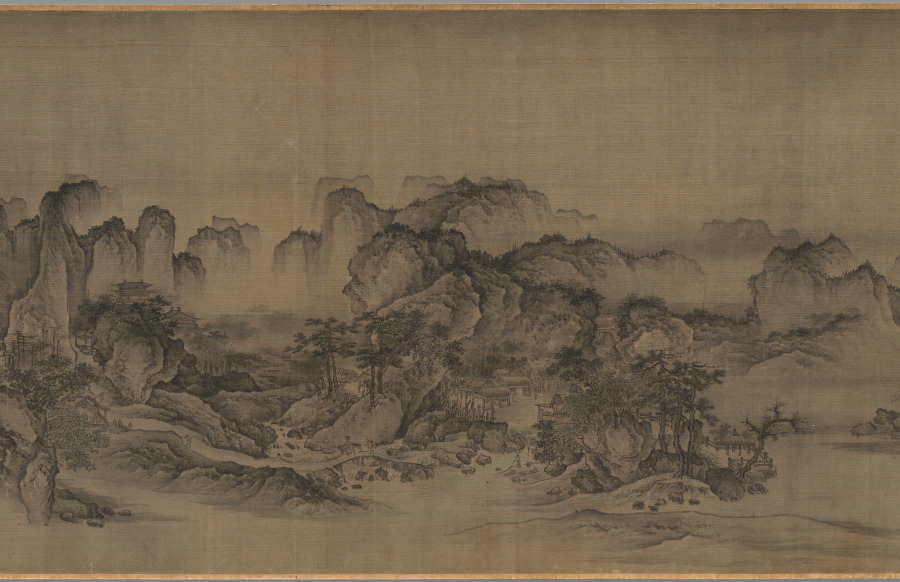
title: Streams and Mountains without End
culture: China, late Northern Song dynasty (960-1127) - Jin dynasty (1115-1234)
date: 1100–1150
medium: handscroll; ink and slight color on silk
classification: Painting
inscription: 9 colophons and 48 seals: 1 colophon, dated 1205, of Wang Wenwei 王文蔚 (dates unknown); 1 colophon, dated 1205, of Li Hui 李惠 (dates unknown); 1 colophon of Weiluo Tian Xie 蔚羅田獬 (dates unknown); 1 colophon, dated 1214, of He Yan 何言 (dates unknown); 1 colophon, dated 1326, of Cao Yuanyong 曹元用 (d. 1329) 1 colophon, dated 1332, of Kangli Zishan 康里子山 (Naonao; 1295-1345); 1 colophon, dated 1336, of Liu Zai 劉載. (dates unknown); 1 colophon, dated 1380, and 4 seals of Yang Mao 楊懋 (1300-after 1380); 4 seals of the Hou family (ca. 1340); 1 colophon of Wang Duo 王鐸 (1592-1652); 4 seals of Zhang Bingqian 張秉乾 (juren of 1729); 8 seals of Liang Qingbiao 梁清標 (1620-1691); 2 seals of the Qianlong emperor (r. 1736-95); 4 seals of the Jiaqing emperor (r. 1796-1820); 3 seals of the Xuantong emperor (r. 1909-11); 2 seals of Ye Gongchuo 葉恭綽 (1881-1968); 17 seals of Zhang Yuan 張爰 (Zhang Daqian 張大千, 1899-1983).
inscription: Colophon 1. Wang Wenwei 王文蔚. Dated third month and third day, 1205, under the reign of Zhangzong of the Jin dynasty. 造物元無心，山川秀氣聚。畫手亦無盡，各出新意度。 誰將妙林泉，淡墨寫縑素。重巒疊嶂間，三兩人家住。 茅舍隔素籬，小橋通細路。溪上數葉舟，雅有物外趣。 嵓崦藏招提，依稀認窗戶。山色四時宜，雲煙自朝暮。 不知塵世中，此景在何處。收拾買山錢，投老好歸去。 泰和乙丑三月三日平原王文蔚謹再拜，書于河東縣署之野趣堂。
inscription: Colophon 2. Li Hui 李惠. The colophon was written three days before the Qingming Festival in 1205. 畫師慣在山中居，含毫吮墨聊自娛。 閑將一段冰霜絹，寫出千里江山圖。 前山後山互出沒，山腰林樾相縈紆。 危橋澗溜瀉鳴玉，山根一匯為平湖。 波平短艇快漁釣，雲深細徑來樵蘇。 僊宮梵宇占幽勝，雕欄複閣森蓬壺。 往來行客煙靄外，飄飄野店青帘孤。 人家雞犬聲相接，熙熙化日安唐宇。 嗟余嗜好何其迂，膏肓泉石真吾徒。 一行作吏墮世網，薄書汨沒勞奔趨。 千巖萬壑但夢想，故園三徑應將蕪。 披圖暫洗黃塵眼，拊膺三嘆空踟躕。 泰和乙丑清明前三日絳臺李惠書于舜城府署之九思堂。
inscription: Colophon 3. Weiluo Tian Xie 蔚羅田獬. 畫工紛紛不可紀，擺脫俗流幾人耳。 夫誰援筆掃鵝溪，一段風煙且千里。 白波青嶂渺無窮，水接山兮山插水。 小橋野店相勾連，古寺樓臺突兀起。 飄然氣象與神俱，但患未明孰姓氏。 郭熙雖老典型存，為問主公無乃是。 此畫世希當寶藏，無與碌碌同一視。 更看卷首數公詩，奇絕清新相表裏。 蔚羅田獬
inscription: Colophon 4. He Yan 何言. Written in 1214. 萬有來自無，一真歸所託。畫師得三昧，胸中幻丘壑。 百態逐墨破，群形隨筆落。地近迹分明，天遙痕隱約。 雲物自吐吞，峯巒非斧鑿。江鄉閴無市，谷關常不鑰。 中有野夫閑，童琴而歩鶴。酒斾出籬懸，漁舟臨岸泊。 澗樹蔽橋樑，巖松迷殿閣。岑疊宿霧重，野曠林煙薄。 危棧接縈紆，亂泉通脈絡。途中人往來，僕馬何羸弱。 怪石虎踡跼，古木龍蟠錯。一幅宜好收，千金非易博。 玉堂閑卷舒，眼界增寥廓。視險尚寛平，見危除慘虐。 氣象溢國華，川澤資廟略。功名業已書，歸去鞭先著。 但知色即空，何是今非昨。飽乎仁智心，箇中無限樂。 貞祐甲戌秋暮，東營何言題。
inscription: Colophon 5. Cao Yuanyong 曹元用 (d. 1329). Dated 1326. 岸擁危橋斷，溪浮小艇斜。 萬山最深處，依約兩三家。 泰定丙寅秋，曹元用題。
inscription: Colophon 6. Kangli Zishan 康里子山 (i.e., Kangli Naonao). The colophon bears a date of 1332. 右溪山圖，意韻蕭灑。一見使人有烟霞之想，真可珍藏。又有□金諸名勝題詩其左。兵火之餘， 殊不易得也。 至順三年暮春之月，康里子山跋。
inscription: Colophon 7. Liu Zai 劉載. 雲拂埜田閑種玉，雨餘巖溜碎傾金。 幾時也結團茆去，麟閤恬然不挂心。 至元二年正月，長安劉載載之謹錄上。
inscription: Colophon 8. Yang Mao 楊懋 (1300–after 1380). 觀此圖，經營位置，筆法高古，山明石潤。其橋梁、路道、樹林、人物、遠近；一一誠得真山水之深趣。非當時名筆有大才者不能至此。不必問其誰何，可為神品。况宋金元三朝名公所跋，尚不能記，想其來尤遠矣。然而物經累變而尚存，是物之有壽者也。余不復再論。文顯其保之。洪武庚申春，八十翁楊懋觀。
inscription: Colophon 9. Wang Duo 王鐸 (1592–1652). 文蓀親翁博雅，文詩鴻暢。舍弟持此喜觀，遂抽管題數語： 山勢委折，筆墨無痕。宋人中如此不多見也。譬之兵家，當是韓白。王鐸。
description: Streams and Mountains without End was a landmark acquisition of 1953, made just a year after Sherman Lee had returned to Cleveland as curator of Oriental art. He acquired it with the intention to provide "a more than adequate foundation for a fine collection of Chinese landscape painting." This impressive work demonstrates the culmination of stylistic developments in Chinese monumental landscape painting following the Northern Song tradition. It represents a journey through a landscape, making it a fitting metaphor for Lee’s journey of discovery and achievement over a lifetime.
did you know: The portrayal of the distant lands is rich with details like pavilions, villages, and human activities.